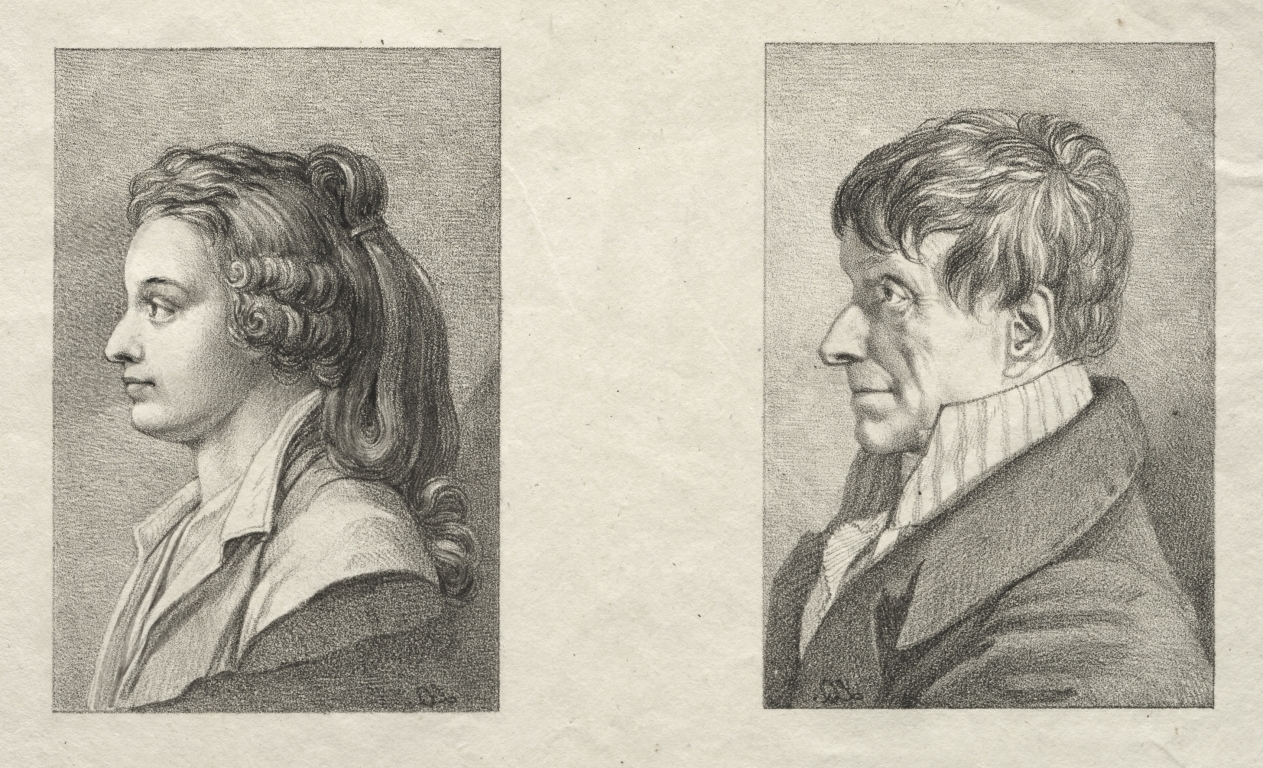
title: Profile Portrait of a Woman and a Man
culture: Germany, 19th century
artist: Lorenzo II Quaglio (German, 1793–1869)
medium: lithograph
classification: Print